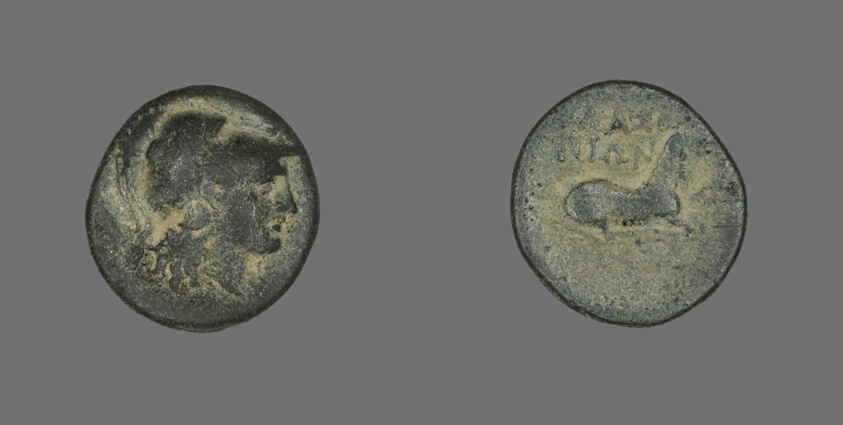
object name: Coin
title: Coin Depicting the Goddess Athena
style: greek, ancient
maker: Greek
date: 387-301 BCE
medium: Bronze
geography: Ancient Greece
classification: coin; ancient art